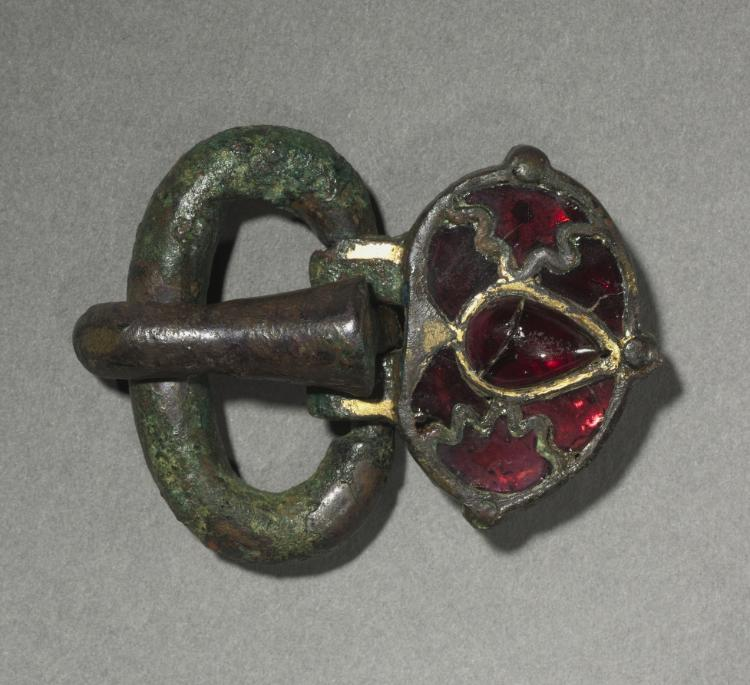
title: Buckle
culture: Hunnish, Migration Period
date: 400s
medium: bronze, traces of gilding, and garnets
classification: Jewelry